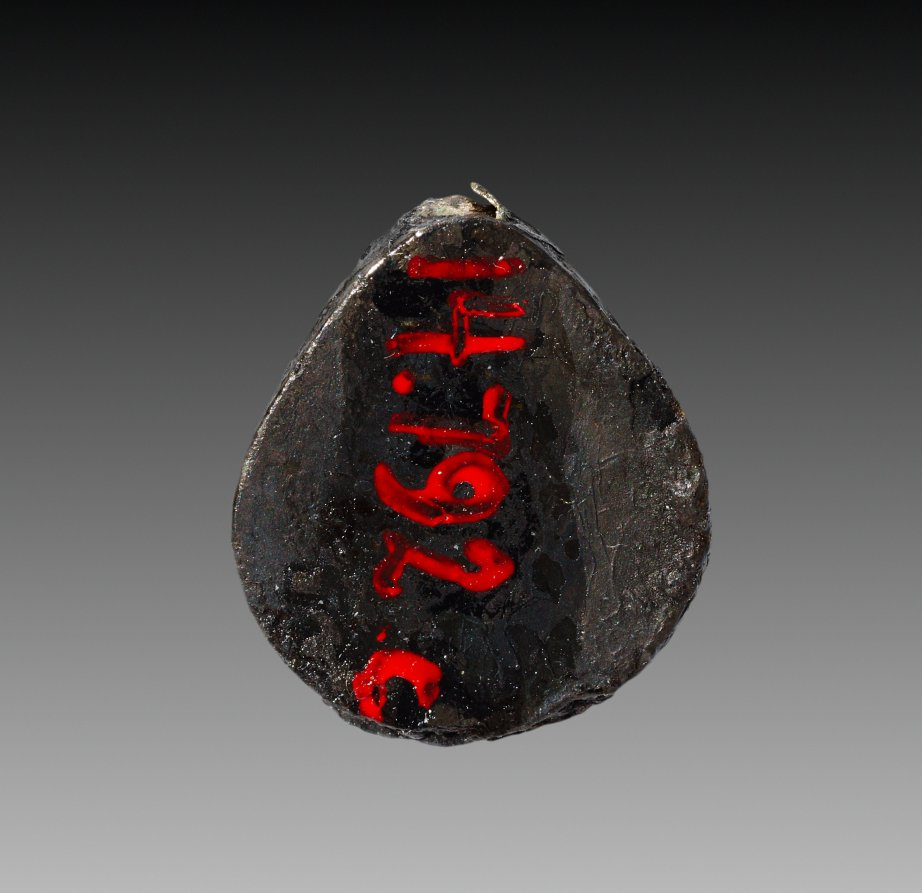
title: Oyster-Shell Pendant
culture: Egypt, Middle Kingdom (2040–1648 BCE), Dynasty 12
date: 1980–1801 BCE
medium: carnelian and silver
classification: Jewelry